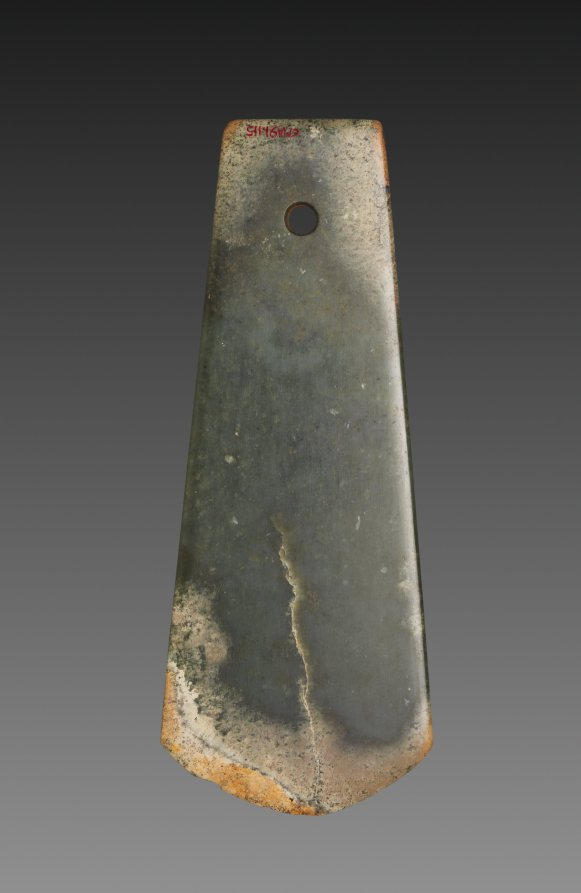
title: Ceremonial Axe (Fu)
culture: China, Erlitou culture (c. 1900–1500 BCE)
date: c. 1900–1500 BCE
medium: jade (nephrite)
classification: Jade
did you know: This ceremonial axe is made of carefully worked jade rather than metal.